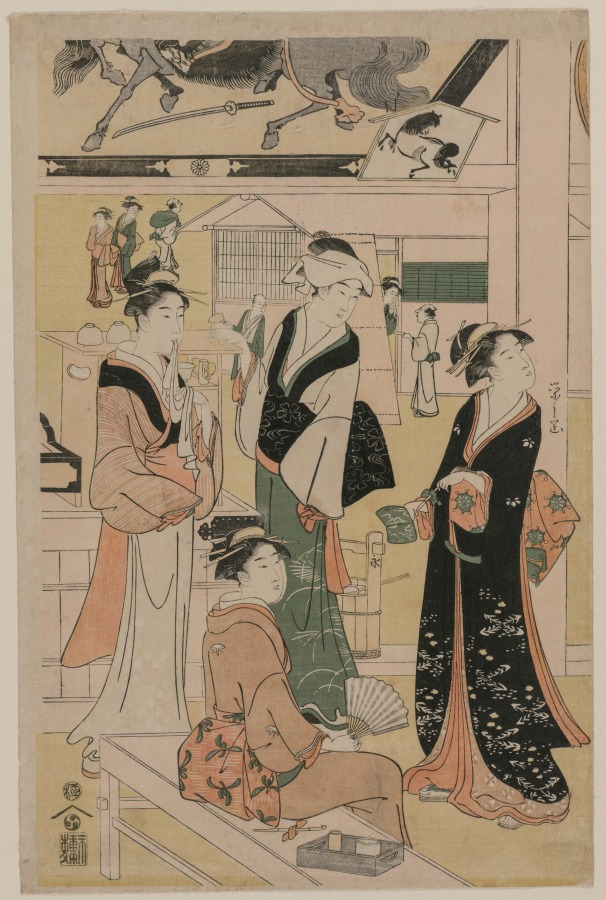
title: Print from Women Resting in the Votive Picture Hall at Asakusa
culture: Japan, Edo period (1615–1868)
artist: Chōbunsai Eishi (Japanese, 1756–1829)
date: early 1790s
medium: woodblock print from a triptych; ink and color on paper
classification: Print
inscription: Signature: Eishi ga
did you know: This print, the right print from a triptych of which the museum has only the left and right, shows people looking at votive plaques called ema hanging near the ceiling of a hall where tea is served to visitors.